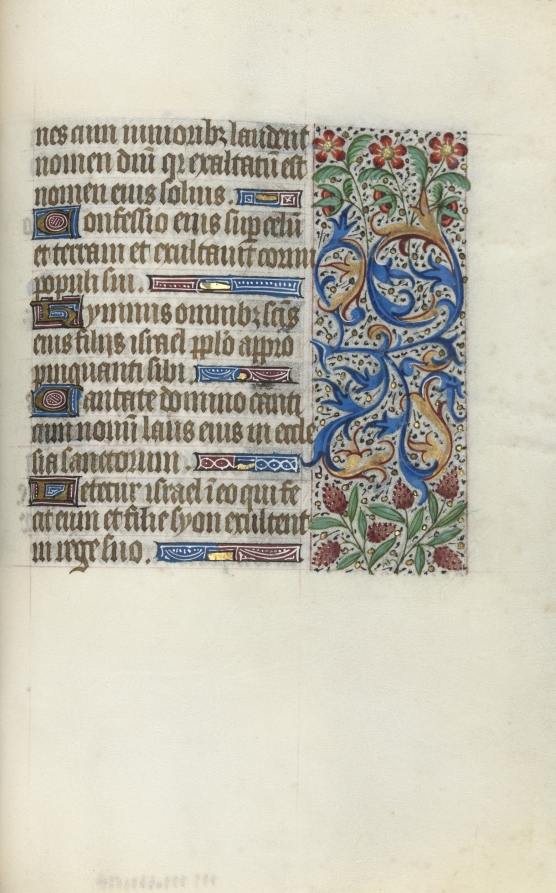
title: Book of Hours (Use of Rouen): fol. 142r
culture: France, Rouen, 15th century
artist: Master of the Geneva Latini (French, active Rouen, 1460–80)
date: c. 1470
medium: ink, tempera, and gold on vellum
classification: Bound Volume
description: In the late 1400s and early 1500s Rouen was an established and important center of book production. The city’s cathedral had a wealthy chapter that spent large sums of money to commission books and to maintain its extensive library. The stationers and booksellers would have likely been concentrated in or near the cathedral precinct. This artist, named after a manuscript now in Geneva, was Rouen’s principal illuminator during the second half of the 1400s.